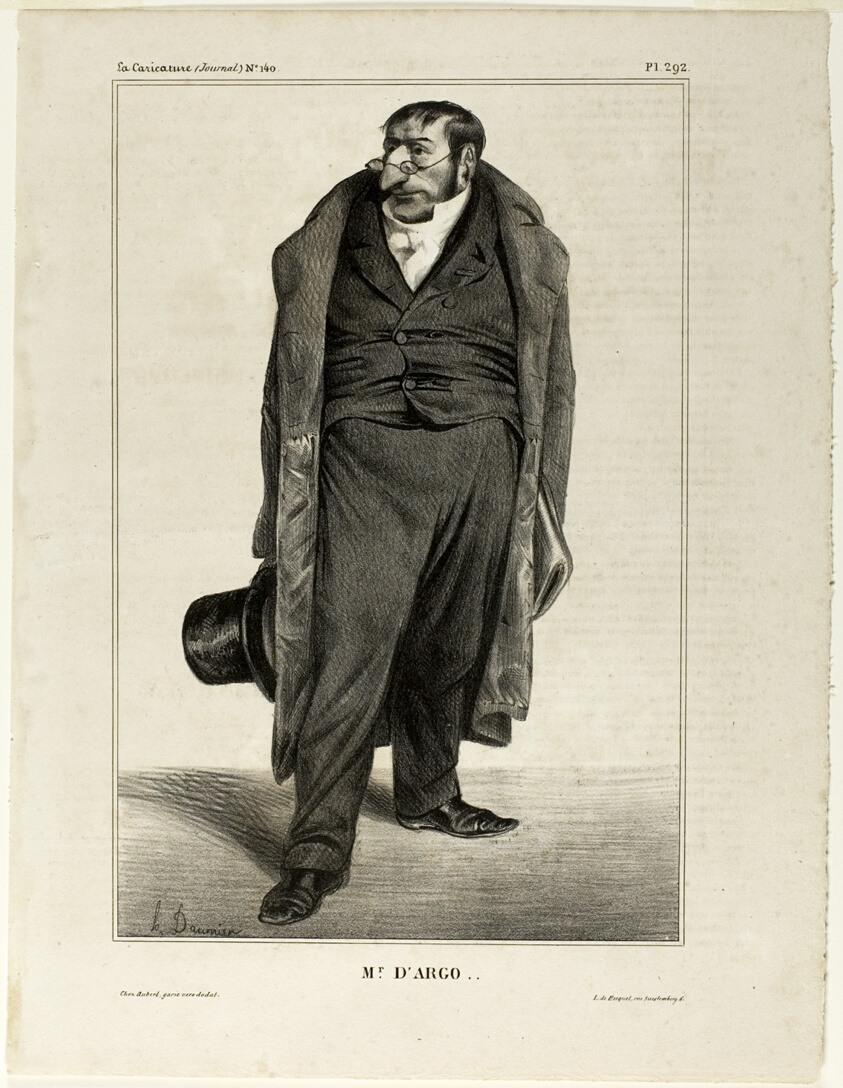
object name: Print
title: Mr. D'argo .., plate 292 from Célébrités de la Caricature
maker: Honoré Victorin Daumier; French, 1808-1879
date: 1833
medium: Lithograph in black on ivory wove paper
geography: France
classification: lithograph; print; prints and drawing